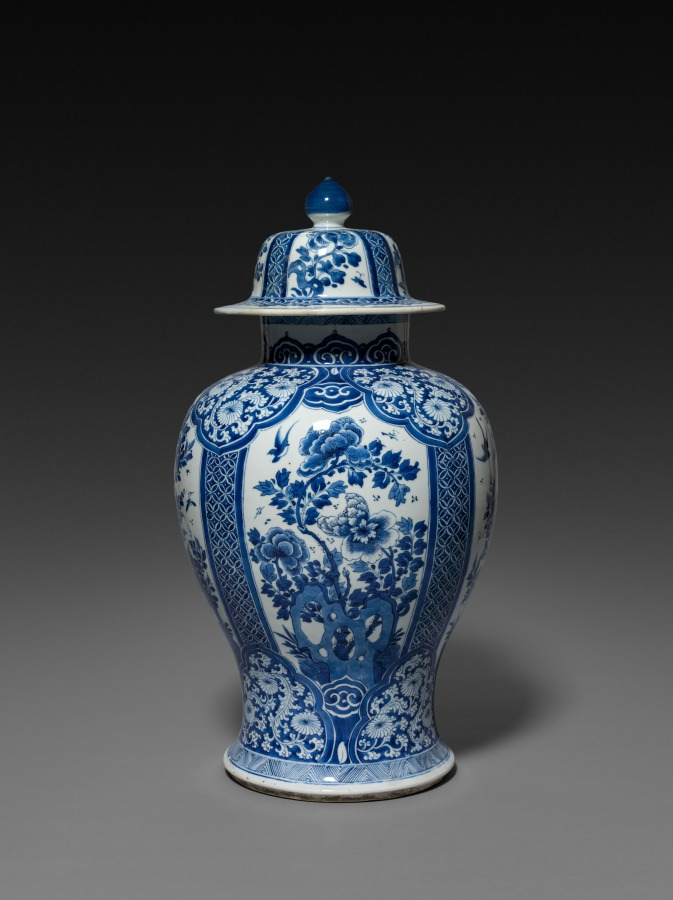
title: Vase with Cover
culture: China, Jiangxi province, Jingdezhen kilns, Qing dynasty (1644–1911), Kangxi reign (1662–1722)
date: 1662–1722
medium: porcelain with underglaze blue decoration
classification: Ceramic